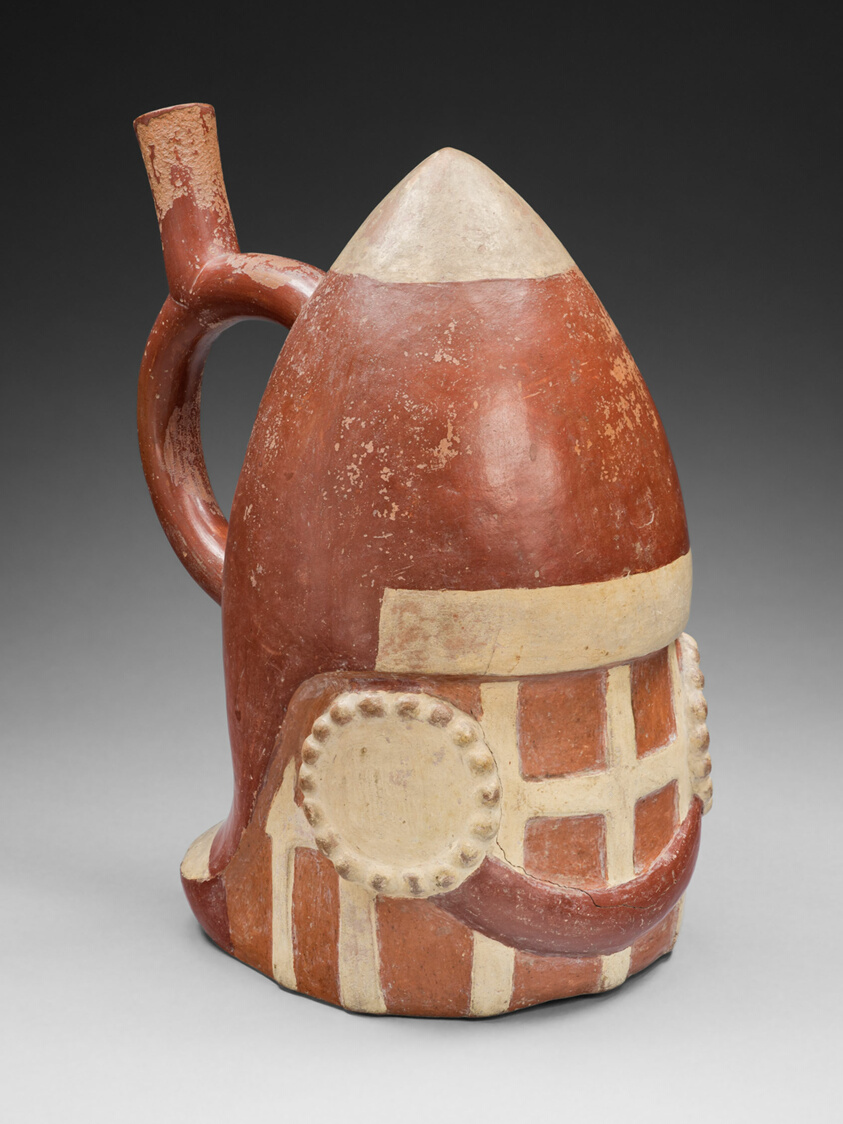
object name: Vessel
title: Vessel in the Form of a Warrior's Helmet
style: moche, mochica iii, mochica, early intermediate period, Pre-Columbian, americas, Arts of the Americas, andean, andes, south american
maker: Moche (North coast, Peru)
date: 100 BCE–500 CE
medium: Ceramic and pigment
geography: Peruvian North Coast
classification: earthenware; ceramics; vessel; art of the americas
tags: warriors, warefare